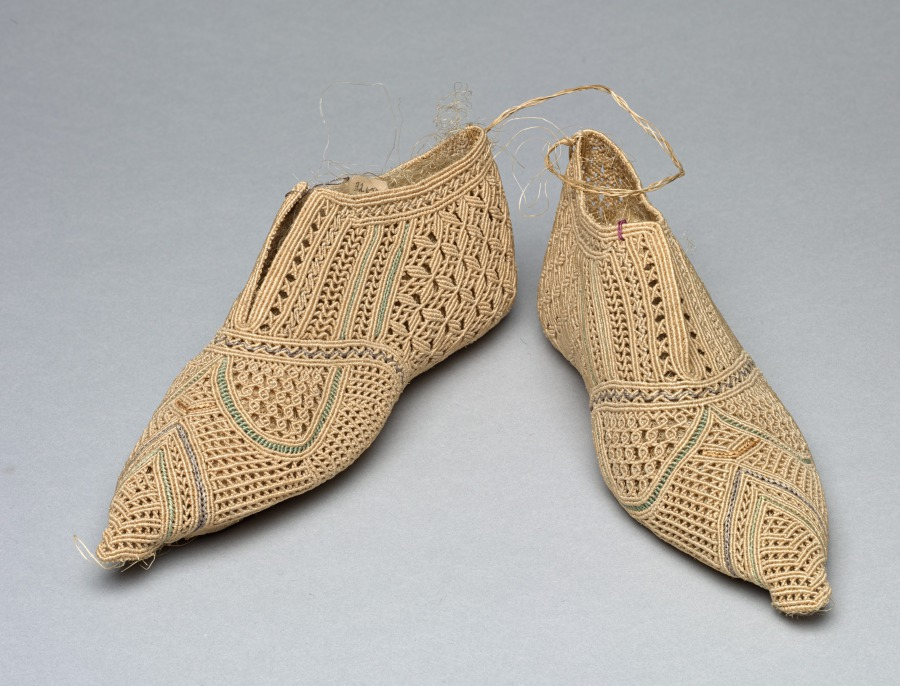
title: Pair of Shoes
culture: Philippines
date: 1850s-1920s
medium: Abacá fiber: macramé knotted lace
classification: Garment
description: Finely knotted abacá fibers form intricate geometric patterns in this small pair of shoes, likely created for display rather than for wear. Some sections are dyed, adding subtle tonal variation to the design. The macramé technique combined with local abacá suggests a colonial-era or early-20th-century hybrid craft, likely taught in a convent or school setting.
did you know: The shoes are unstitched at the bottom, suggesting they were never meant to be worn.